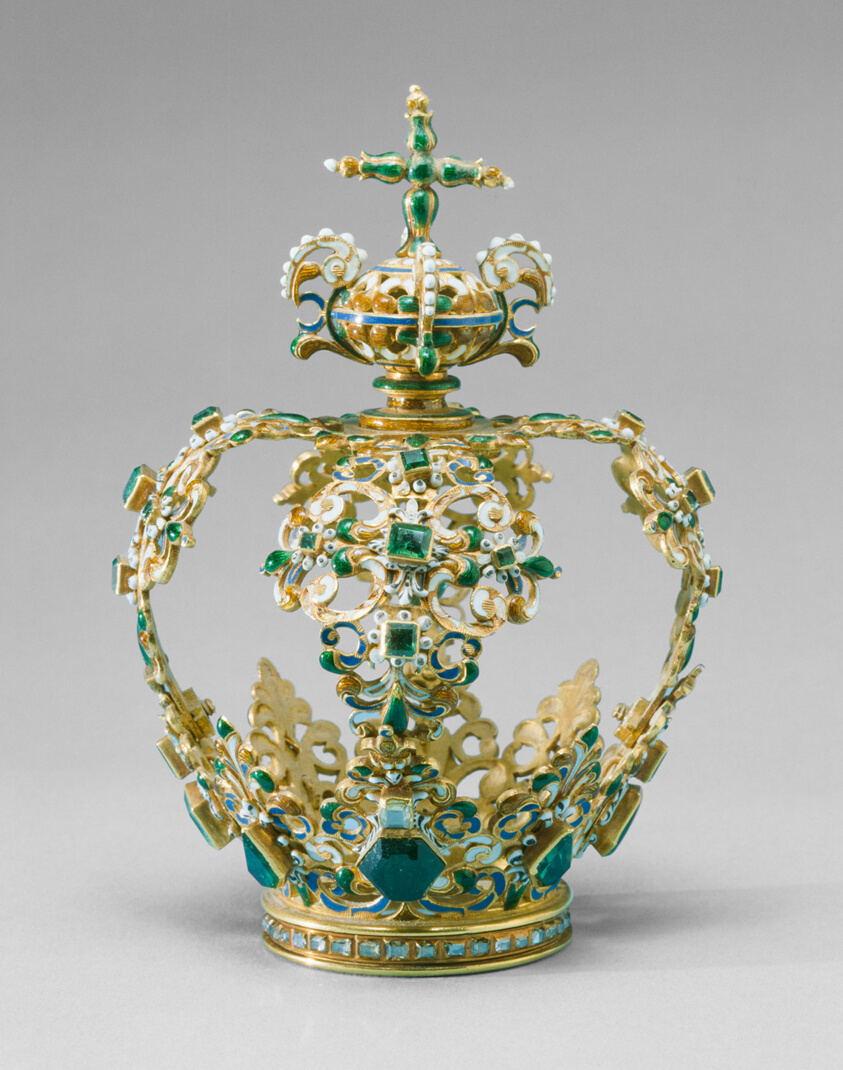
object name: Costume and Accessories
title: Crown, Probably for a Statue of the Christ Child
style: spanish colonial, european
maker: Spanish or Spanish Colonial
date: c. 1600-c. 1650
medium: Gold, enamel, emeralds, diamonds, and pearls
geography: Spain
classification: jewelry; european decorative arts; costume